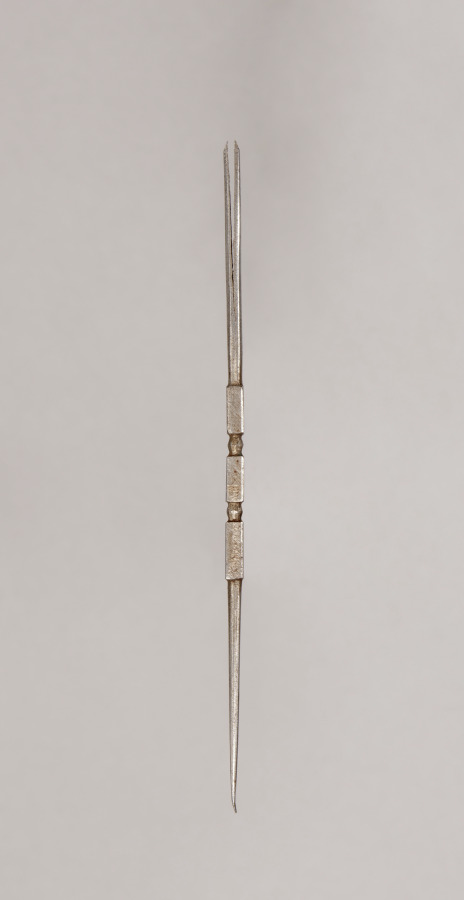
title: Scabbard Tweezers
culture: Africa, Sudan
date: 1880–1910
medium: metal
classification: Arms and Armor